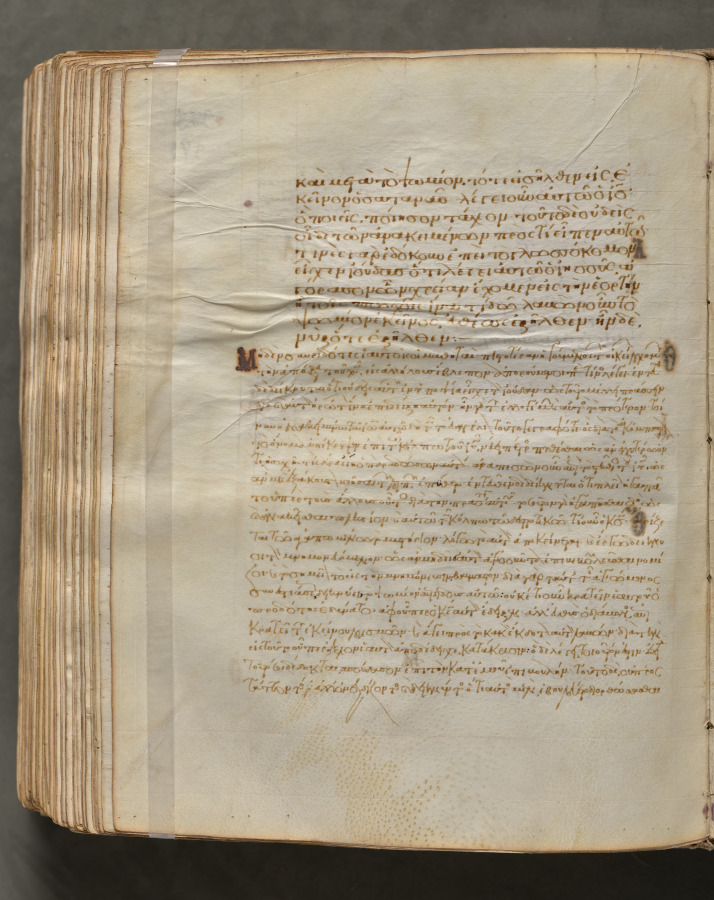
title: Text, folio 390 (verso), from a Gospel Book with Commentaries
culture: Byzantium, Constantinople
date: c. 1000–1100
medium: ink, tempera, and gold on vellum; leather binding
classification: Bound Volume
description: Each of the four gospels in this book opens on a page with brilliantly illuminated borders depicting the author of the text as well as birds—principally peacocks, symbols of the immortality of the soul—and fountains, representing the fountain of life and the salvation of the soul. This volume consists of 428 leaves with texts in Greek. Its level of sophistication suggests that it was probably written and decorated in a monastery in Constantinople.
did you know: Gospel books were carried in procession through Byzantine churches.